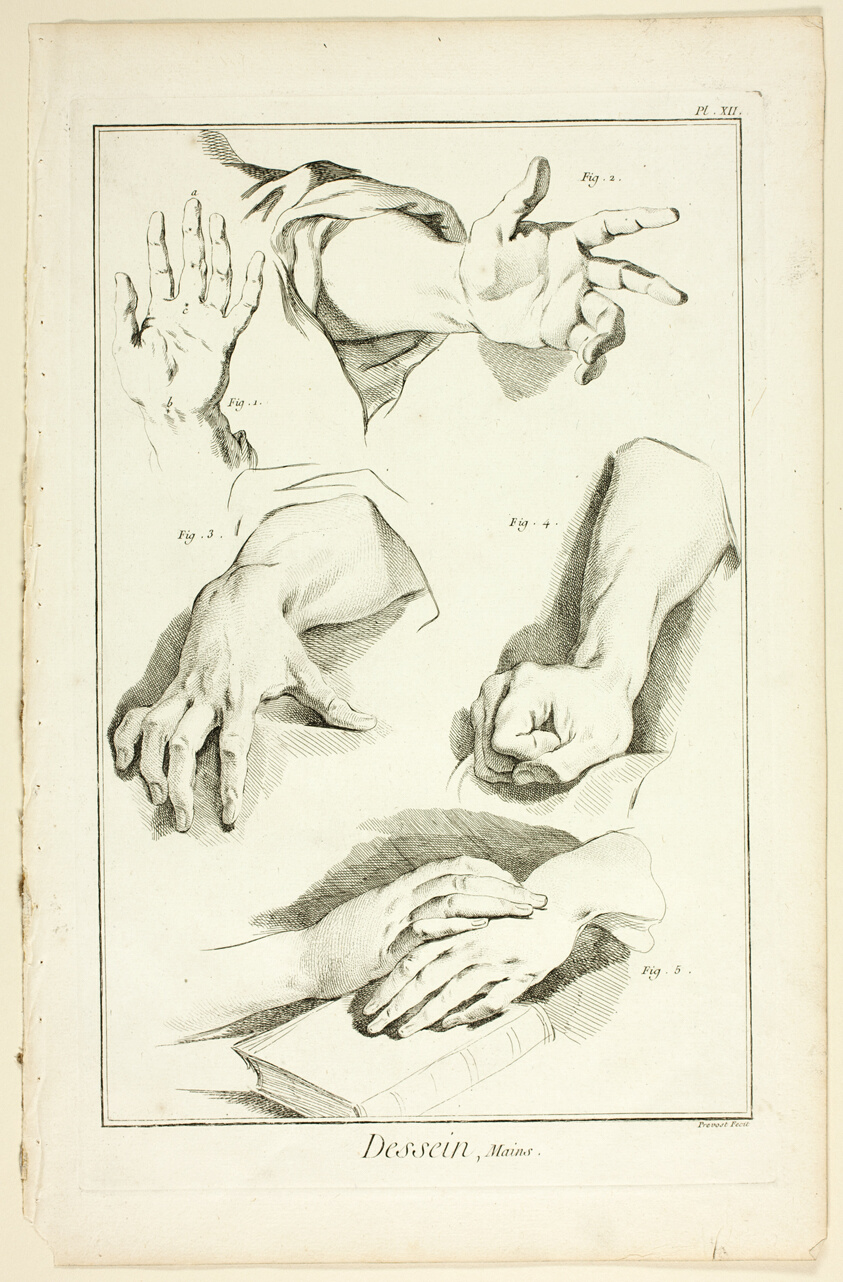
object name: Print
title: Design: Hands, from Encyclopédie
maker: Benoît-Louis Prévost (French, c. 1735-1809); published by André le Breton (French, 1708-1779), Michel-Antoine David (French, c. 1707-1769), Laurent Durand (French, 1712-1763), and Antoine-Claude Briasson (French, 1700-1775)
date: 1762/77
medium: Etching, with engraving, on cream laid paper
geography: France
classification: etching; print; prints and drawing